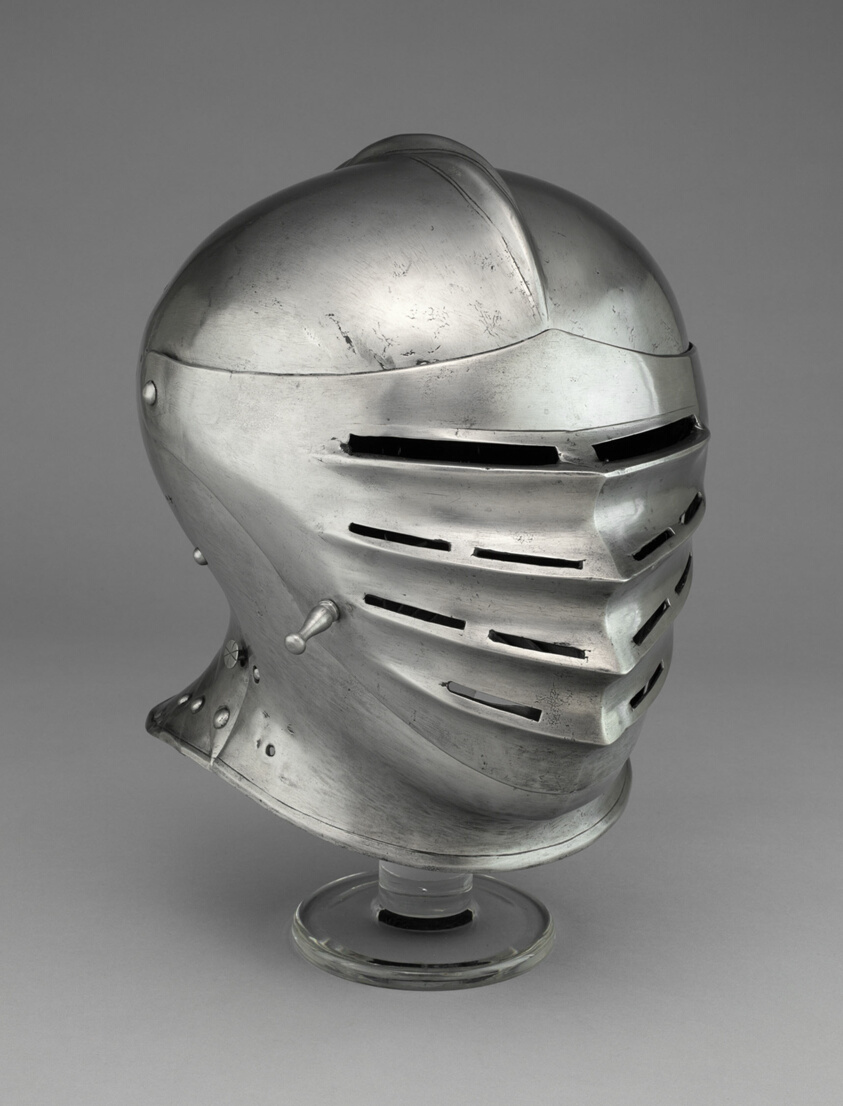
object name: Armor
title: Close Helmet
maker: Southern German or Austrian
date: 1520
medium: Steel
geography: Southern Germany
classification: suit-helmet; armor; arms and armor